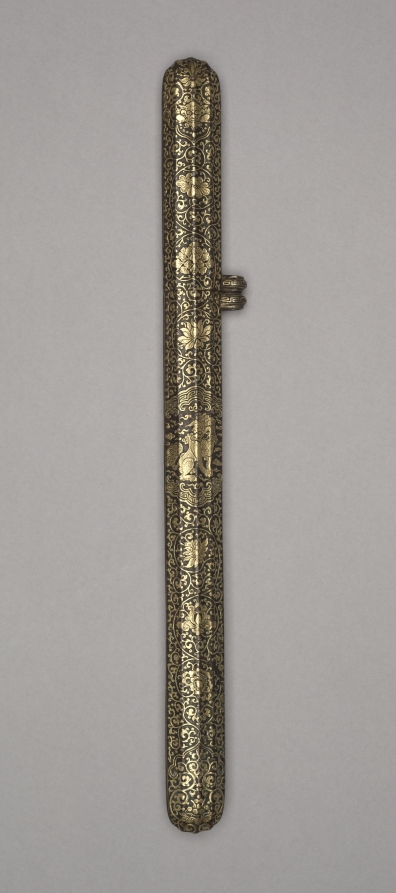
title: Sheath for a Dagger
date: c. 1600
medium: case: iron alloy with gold inlay; pen: feather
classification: Arms and Armor